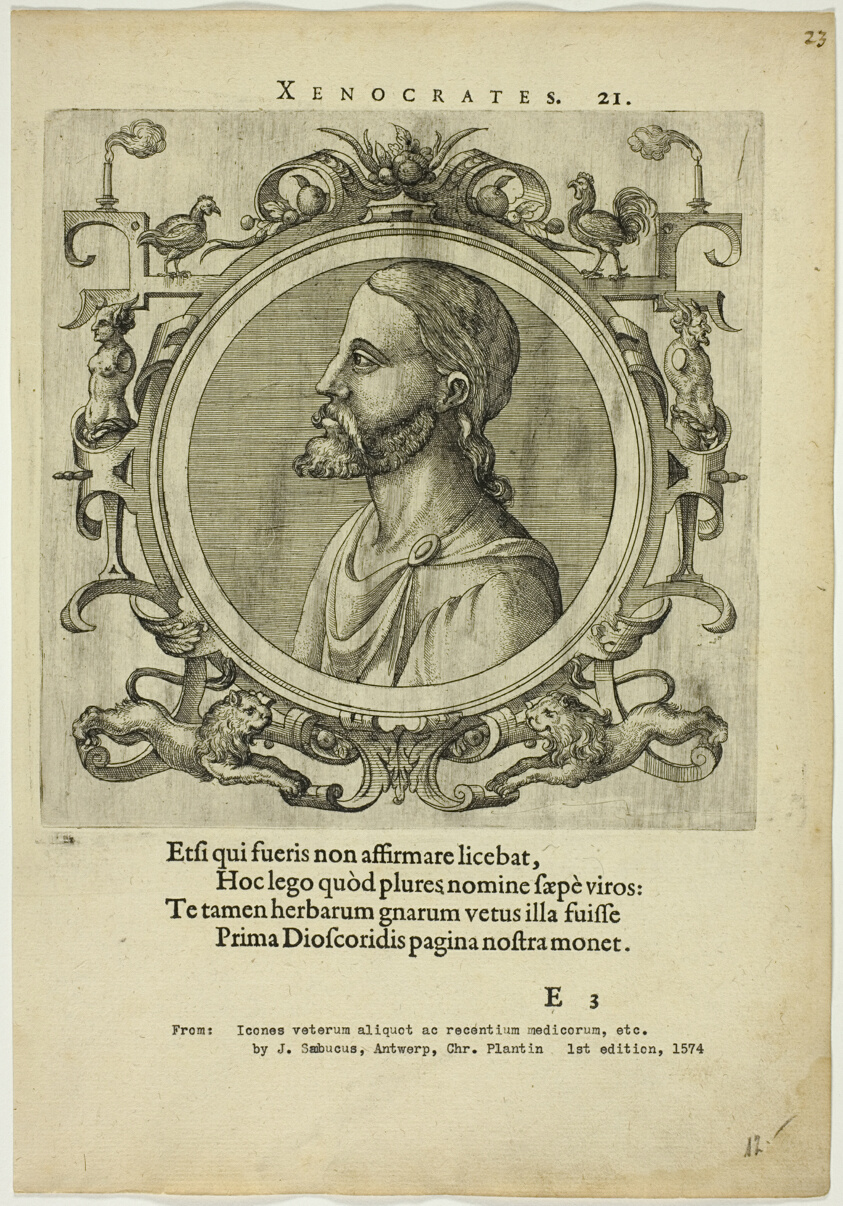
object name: Print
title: Portrait of Xenocrates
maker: Unknown Artist (Flemish); written by Johannes Sambucus (Flemish, 1531-1584)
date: published 1574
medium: Etching, with engraving, on cream laid paper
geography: Flanders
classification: etching; print; prints and drawing